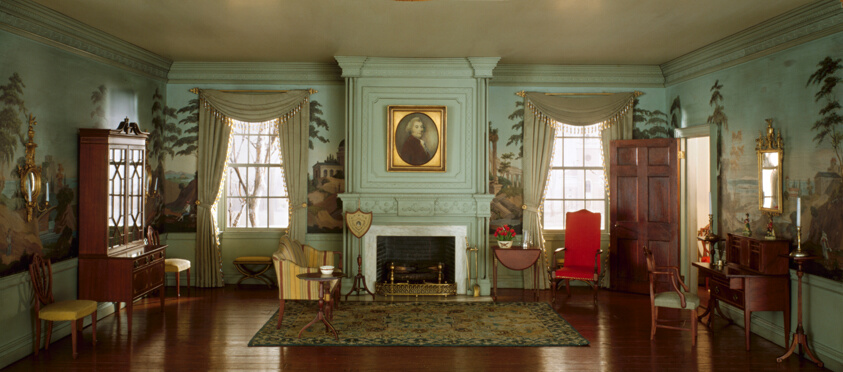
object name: Miniature room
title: A9: Massachusetts Parlor, 1818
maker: Designed by Narcissa Niblack Thorne; American, 1882-1966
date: c. 1940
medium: Miniature room, mixed media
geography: United States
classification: miniature; thorne rooms